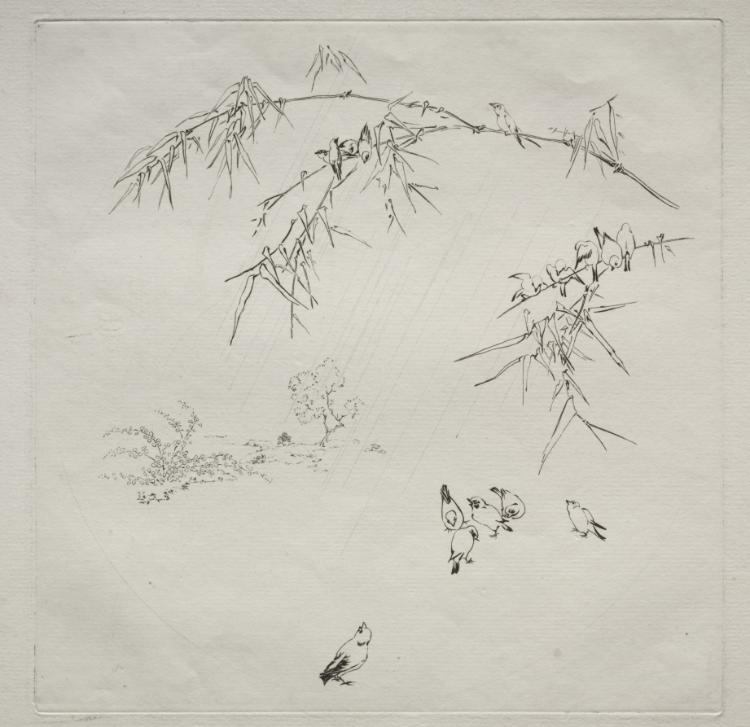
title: Parisian Service (Haviland service): Rain (no. 10)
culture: France, 19th century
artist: Félix Bracquemond (French, 1833–1914)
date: 1875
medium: etching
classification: Print